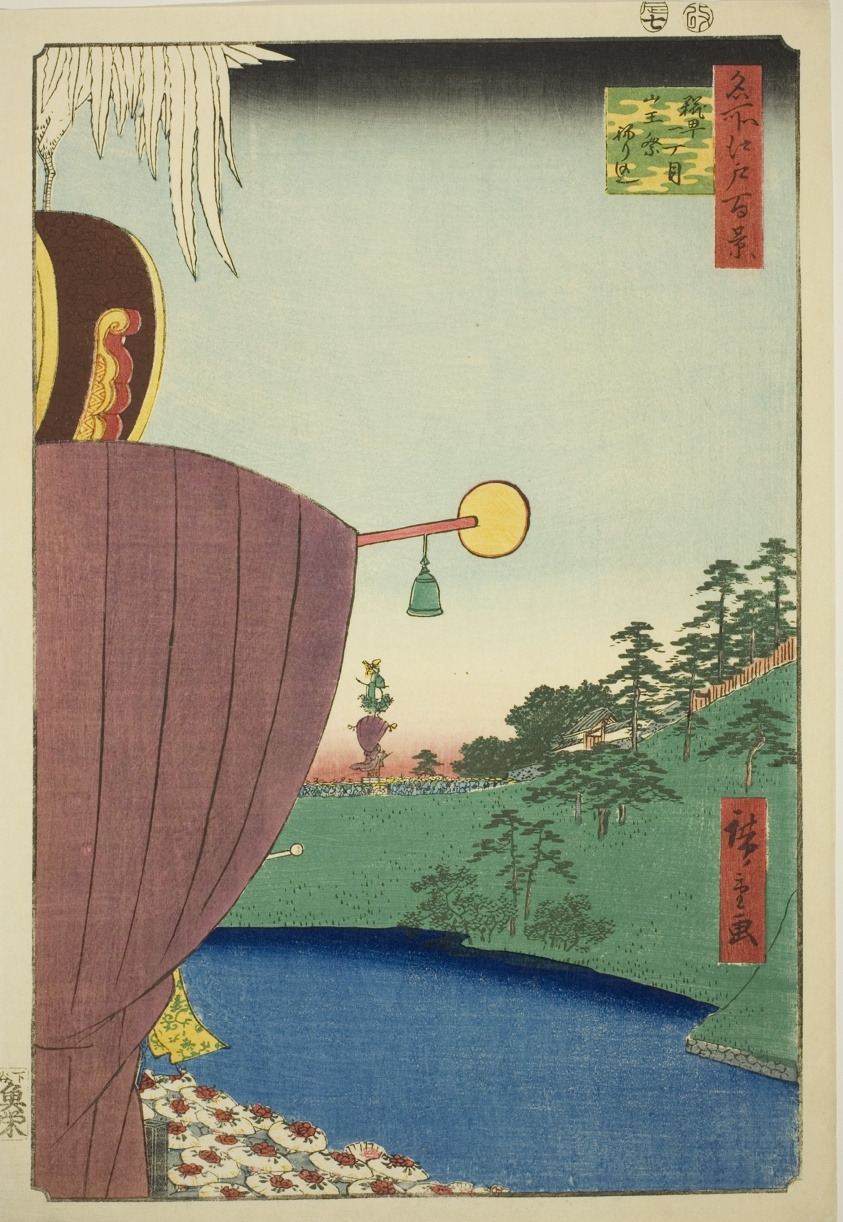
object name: Print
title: Sanno Festival Procession at Kojimachi Itchome (Kojimachi Itchome Sanno Matsuri nerikomi), from the series "One Hundred Famous Views of Edo (Meisho Edo hyakkei)"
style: Japanese (culture or style)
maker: Utagawa Hiroshige 歌川 広重; Japanese, 1797-1858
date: 1856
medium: Color woodblock print; oban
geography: Japan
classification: woodblock print; print; asian art